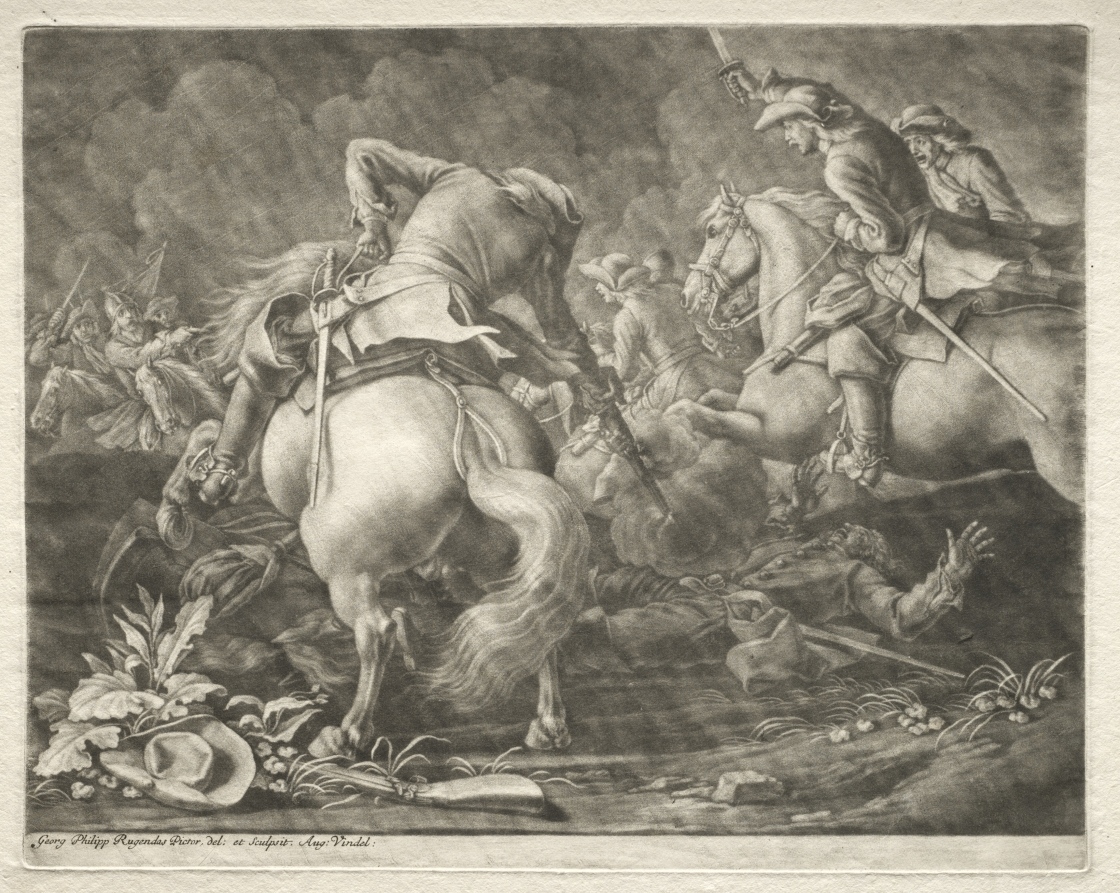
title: Skirmish between Prussian and Hungarian Hussars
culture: Germany, 18th century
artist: Georg Philipp I Rugendas (German, 1666–1742)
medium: mezzotint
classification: Print